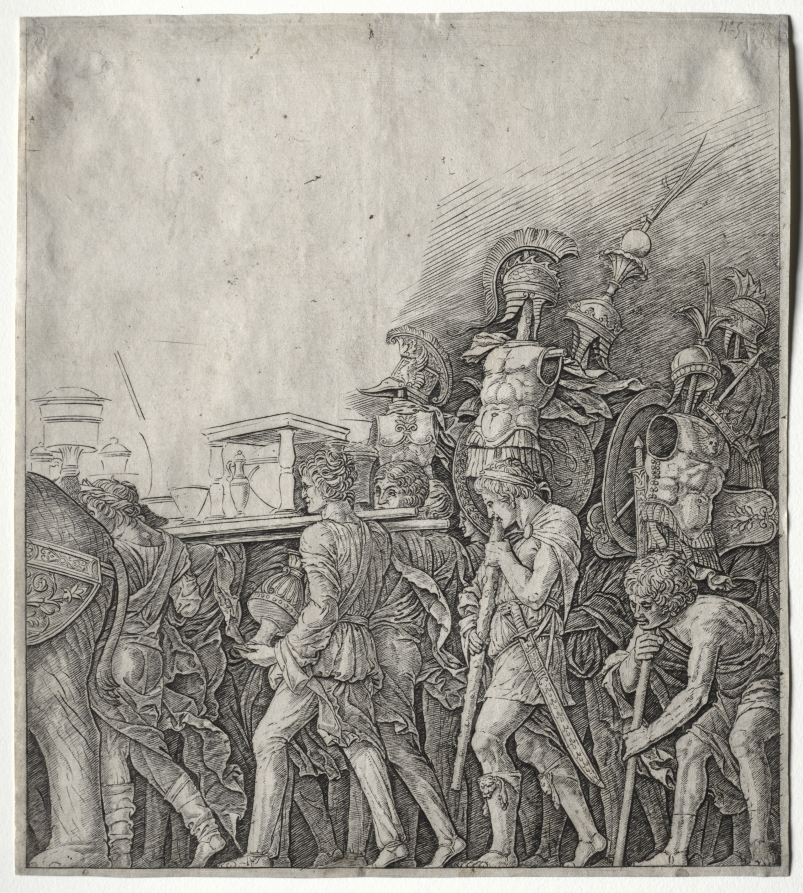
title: The Triumphs of Caesar: The Corselet Bearers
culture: Italy, 15th century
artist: Giulio Campagnola (Italian, 1482–1515)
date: c. 1498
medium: engraving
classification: Print